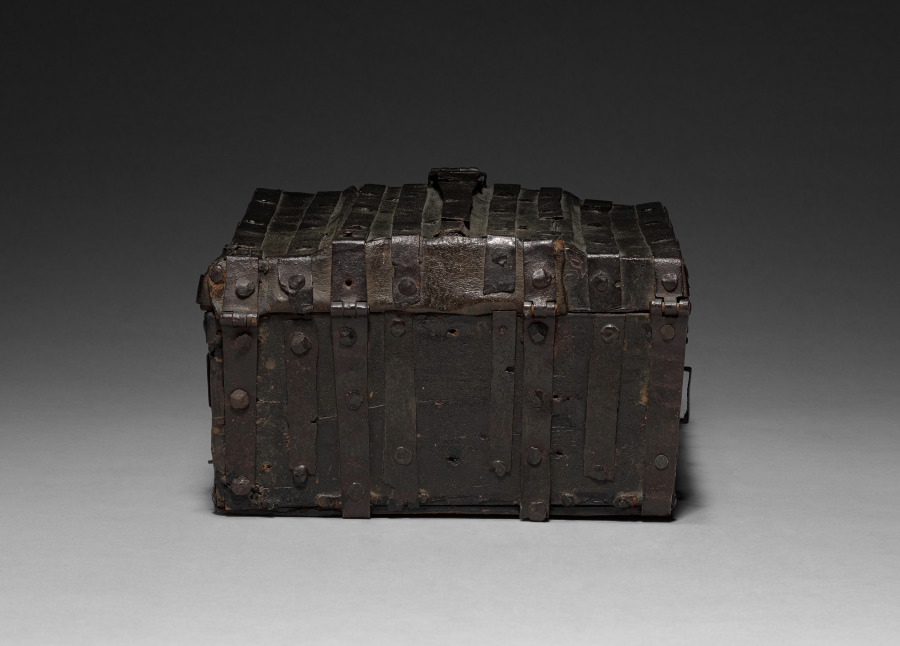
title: Coffret with Woodcut of Saint Veronica's Vernicle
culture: Coffret: France, probably Paris; Woodcut: Germany, Augsburg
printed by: Hans Burgkmair the Elder (German, 1473–1531)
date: Coffret: c. 1515; Woodcut: c. 1509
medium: Wood, leather, iron, textile, woodcut with stenciled coloring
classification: Print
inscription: SALVE. XPI. EFFIGIES. SACERRI[M]A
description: This remarkable object is thought to have functioned as a traveling case to keep small valuables and books, as well as a provisional altar. Made in France around 1515, the interior lid is affixed with a devotional woodcut made in Germany, imported, and colored for the purpose. Featuring an image of the veil of Saint Veronica, the text at the bottom of the woodcut guides the user in prayer to the holy image of Christ’s face which has been miraculously imprinted on the veil, an action that held promise of indulgences (a reduction in one’s punishment for sins). Presumably, the owner carried the box on a journey, retrieved a prayer book from inside, and propped it open in order to practice daily prayers.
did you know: A secret compartment on the top lid of this coffer may have held a relic, consecrated host, or valuable document.